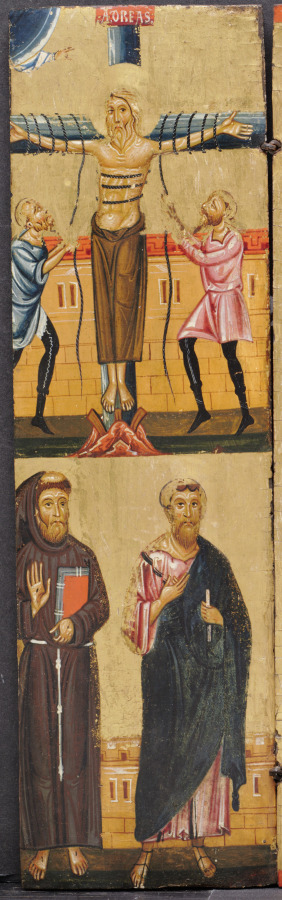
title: The Crucifixion of St. Andrew, with St. Francis and St. Paul below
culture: Italy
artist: Berlinghiero (Italian, before 1242)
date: c. 1230s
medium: tempera and gold on wood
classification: Painting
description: This small altarpiece, intended for a domestic interior or private chapel, consists of three panels, allowing it to be folded and easily transported. Surrounding the Virgin and Child in the center are various saints. On the left is Saint Andrew crucified, with St. Francis and St. Paul below; on the right, Christ with the instruments of the Passion, and St. Stephen and St. Lawrence below. The long expressive lines that define the clothing and hands of the figures are typical of Byzantine painting, which spread from Constantinople to Italy in the Middle Ages. Berlinghiero is one of the earliest Italian painters known by name. He lived in Lucca, the most important artistic center in Tuscany before the rise of Siena and Florence. Berlinghiero headed a large, influential workshop that included his sons.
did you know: Berlinghiero is one of the earliest Italian painters known by name. He headed a large workshop in Lucca, the most important artistic center in Tuscany before the rise of Siena and Florence.